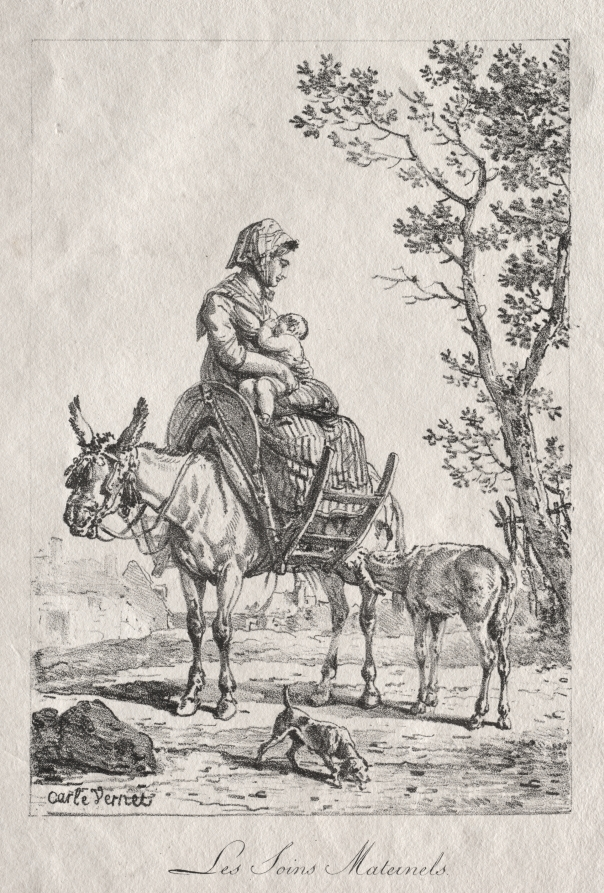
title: Maternal Care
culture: France, 19th century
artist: Carle Vernet (French, 1758–1836)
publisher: Delpech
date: c. 1818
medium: lithograph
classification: Print